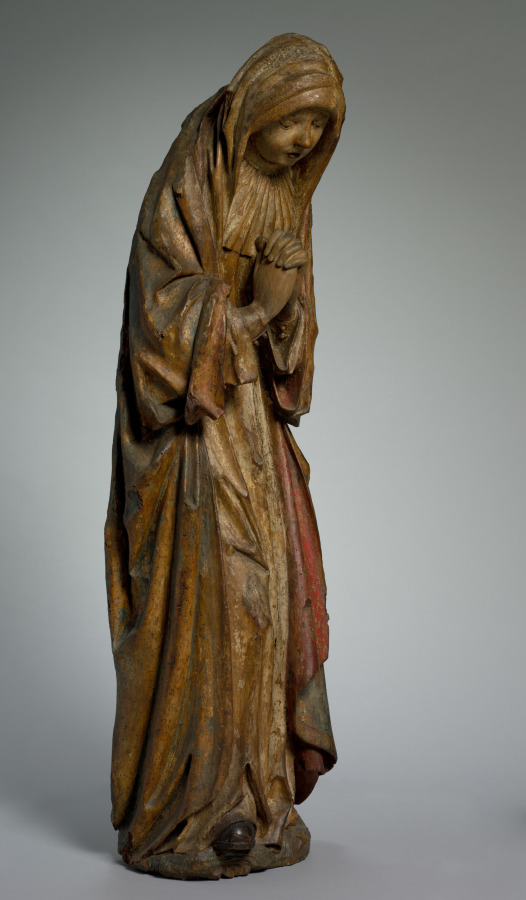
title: Virgin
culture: France, Champagne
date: 1510–15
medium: painted oak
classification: Sculpture